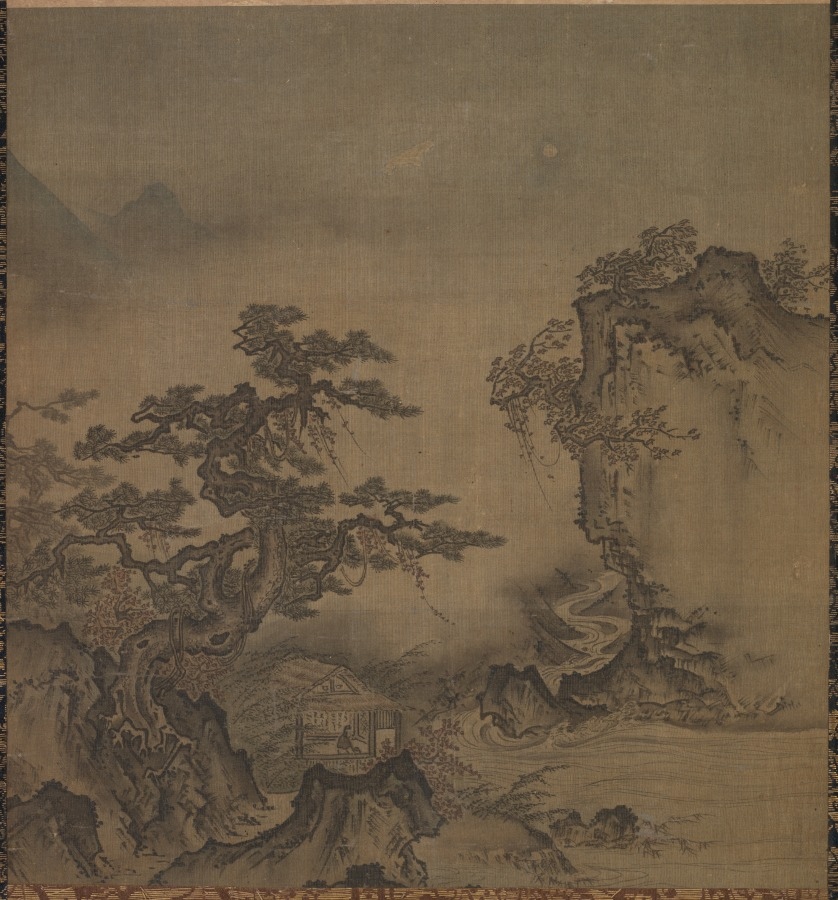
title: Landscape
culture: Japan, possibly Edo period (1615-1868)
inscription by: copy after Ishō Tokugan (Japanese, c. 1359–1437)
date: early 1600s to mid-1800s?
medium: hanging scroll; ink and slight color on paper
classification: Painting